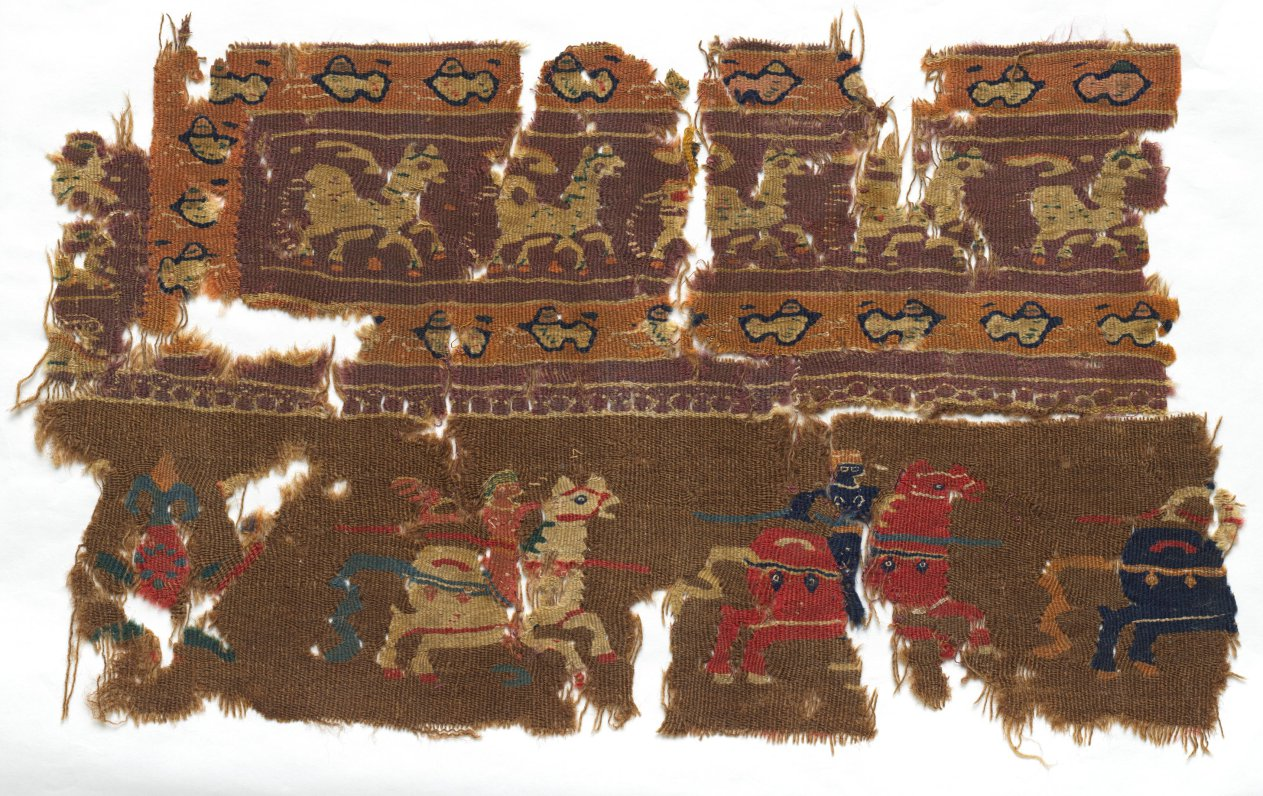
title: Fragment of a Tunic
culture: Egypt, Byzantine period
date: 400s–600s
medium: Wool and linen: tapestry weave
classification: Textile